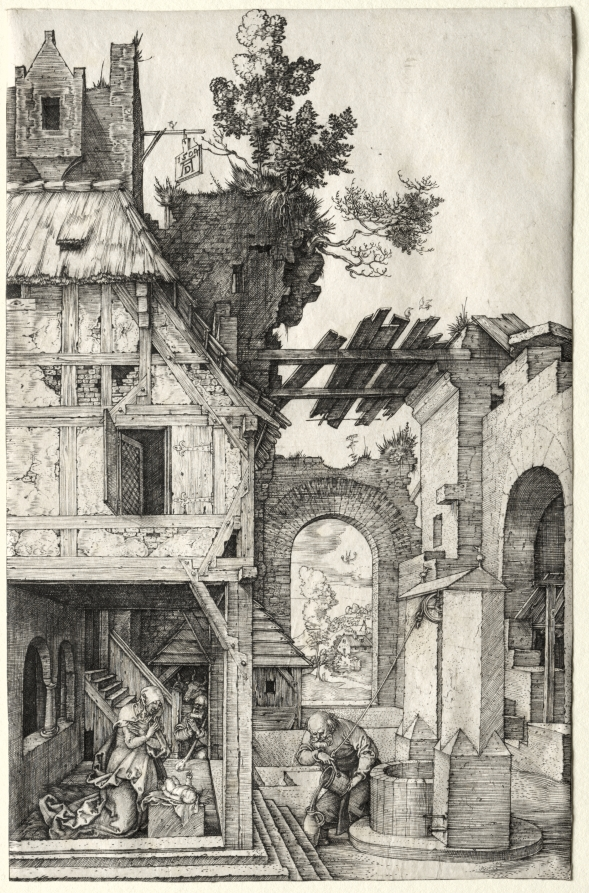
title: The Nativity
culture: Germany, early 16th Century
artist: Albrecht Dürer (German, 1471–1528)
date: 1504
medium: engraving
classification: Print